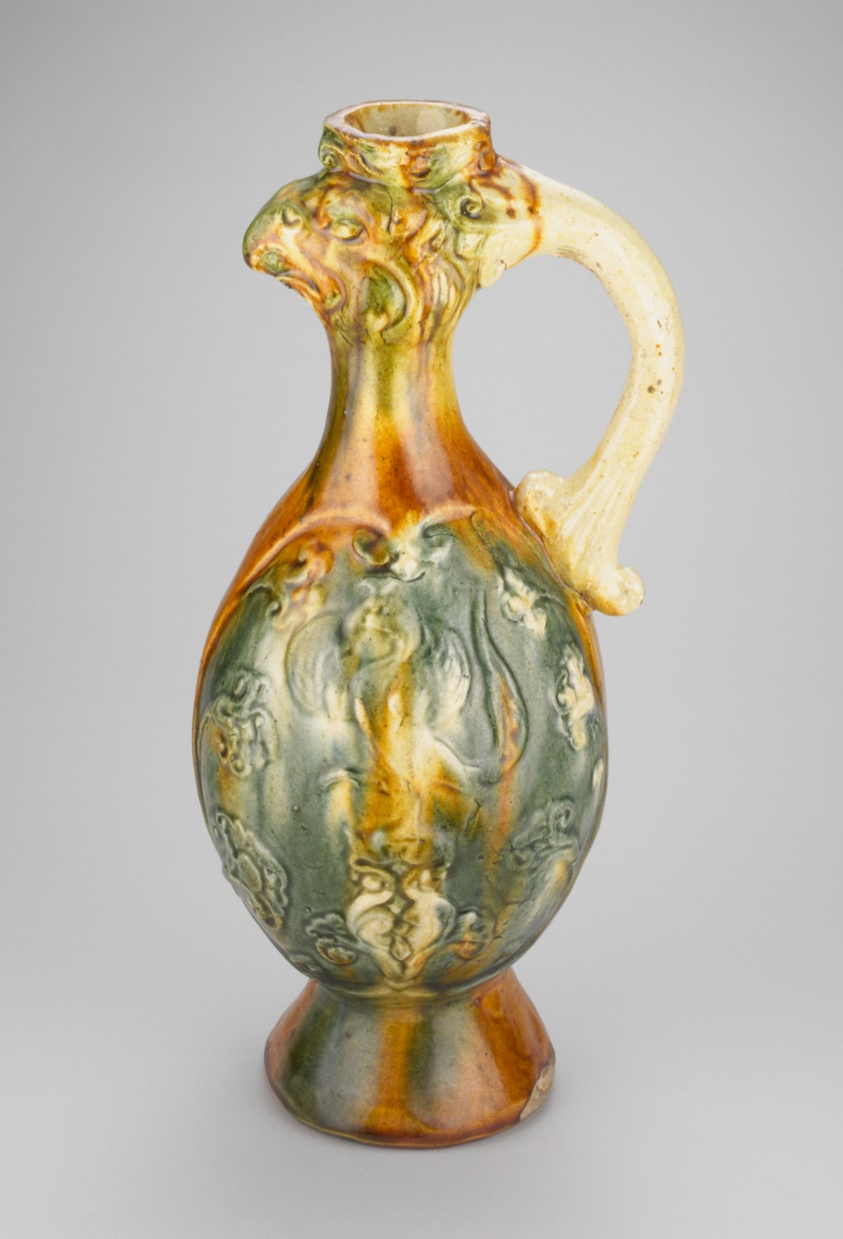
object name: Vessel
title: Phoenix-Headed Ewer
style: Chinese (culture or style)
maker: China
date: Tang dynasty (618–907), first half of 8th century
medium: Earthenware with molded decoration and three-color (sancai) lead glazes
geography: China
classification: ewer (vessel); vessel; earthenware; asian art; ceramics; decorative arts